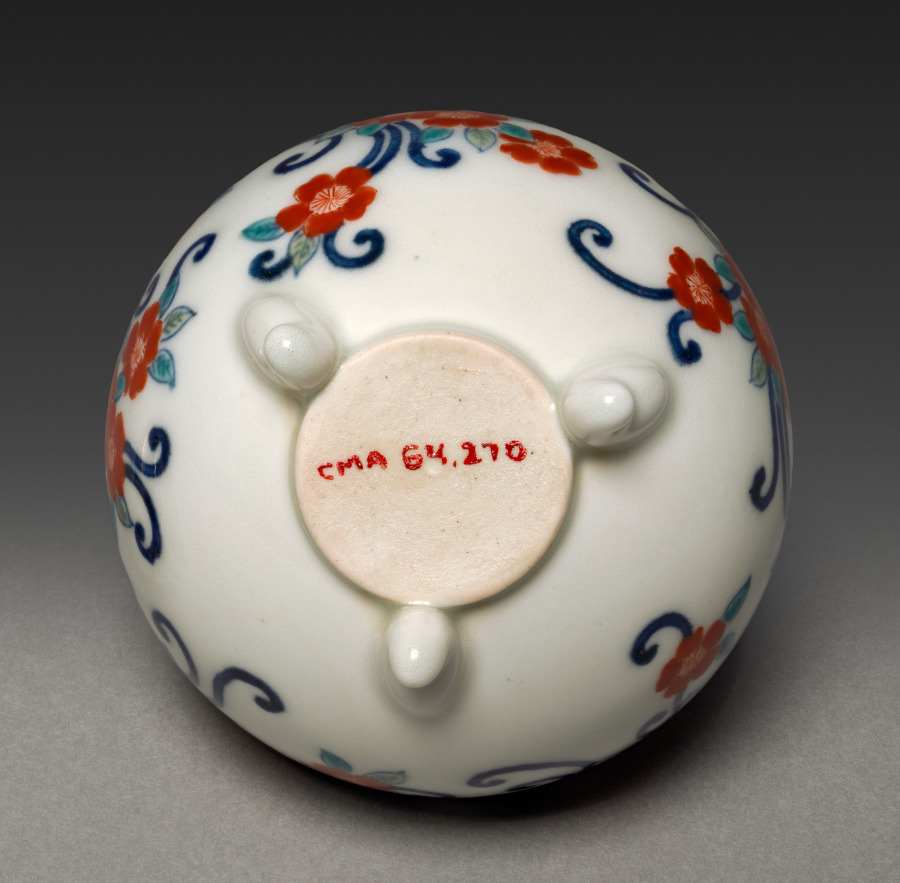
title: Incense Burner with Floral Scroll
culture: Japan, Edo period (1615–1868)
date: early to mid-1800s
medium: Porcelain with underglaze blue and overglaze enamel decoration (Hizen ware, Nabeshima style)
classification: Ceramic